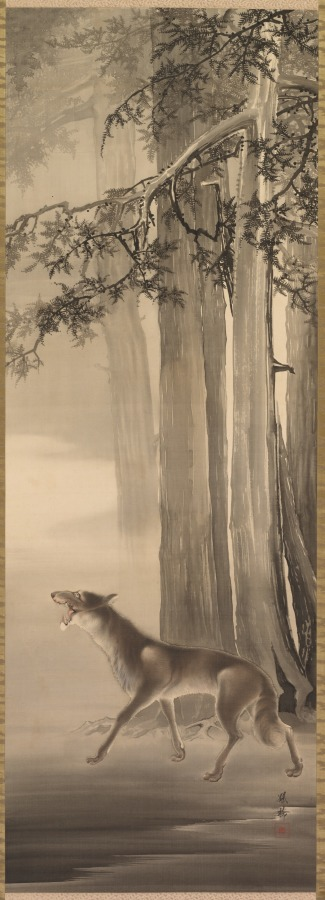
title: Howling Wolf in a Deep Mountain Valley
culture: Japan, Taishō period (1912–26)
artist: Yoshimura Hōryū (Japanese, 1874–1950)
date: 1912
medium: Hanging scroll; ink and color on silk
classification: Painting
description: A wolf howls beneath the tall pines in a misty landscape. The painter was born in the bustling city of Osaka in the Kansai region. He studied with Mori Jihō (1818–1891) and admired the Maruyama school of painters. He was especially gifted at depicting deer, monkeys, tigers, weasels, and other animals.